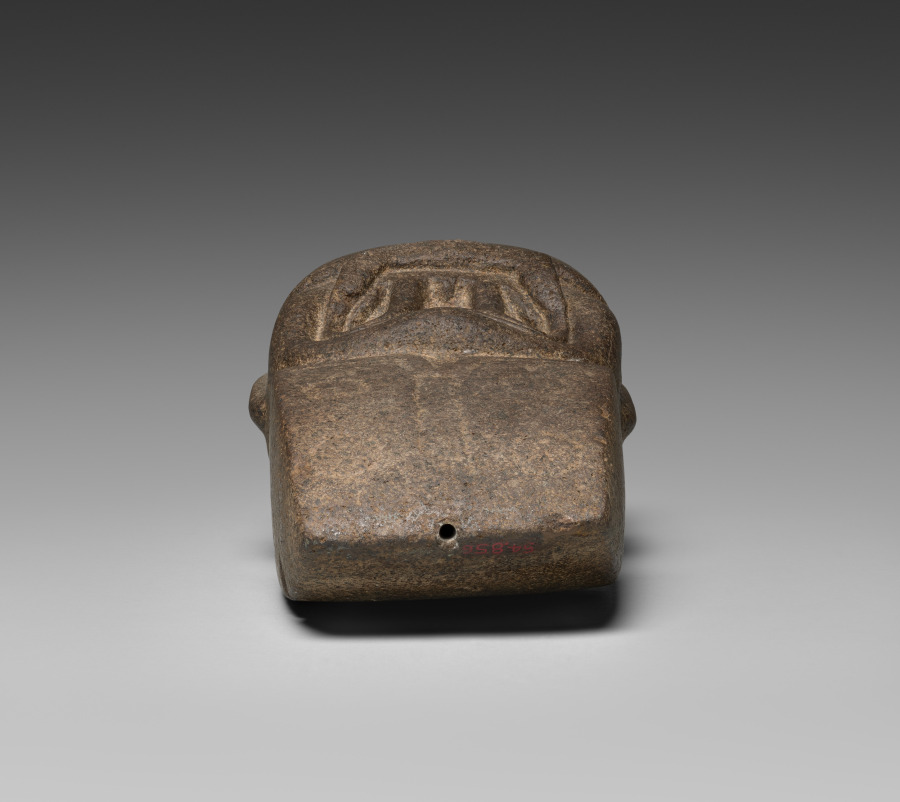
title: Celt with Deity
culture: Mesoamerica, Mexico, Olmec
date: 1000–300 BCE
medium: stone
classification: Sculpture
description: This ceremonial object has the head of a deity and a body shaped like an axe blade (celt) used to clear land for agriculture. The flared mouth, toothless gums, and fangs are typical of Olmec supernatural beings. The meaning of the body's "four-dots-and-a-bar" motif is unclear, but it sometimes appears in depictions of plants. The deity, then, seems to be associated with fertility.